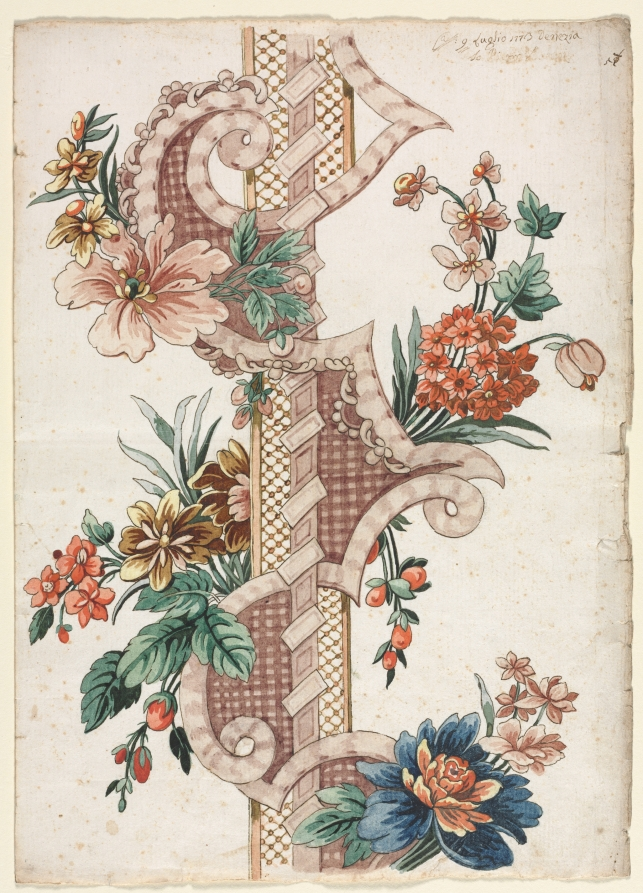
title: Vertical Decorative Floral Band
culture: Italy, 18th century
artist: Giacomo Cavenezia (Italian)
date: 1773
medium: pen and brown ink, brush and brown wash, gouache and watercolor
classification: Drawing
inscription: by artist, upper right, in brown ink: @ [underlined twice]: 9 [underlined twice] luglio 1773 Venezia / So P[illegible] ; upper right, in brown ink: [illegible]